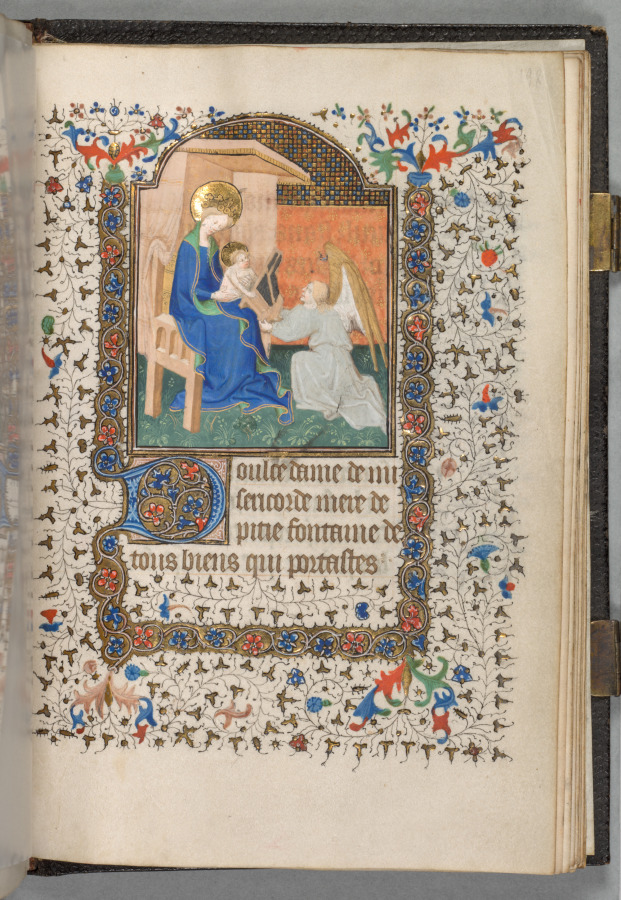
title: Book of Hours (Use of Paris): Fol. 198r, Madonna and Child with Angel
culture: France, Paris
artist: possibly studio or workshop of The Bedford Master (French, Paris, active c. 1405–30)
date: c. 1420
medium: ink, tempera, and gold on vellum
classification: Bound Volume